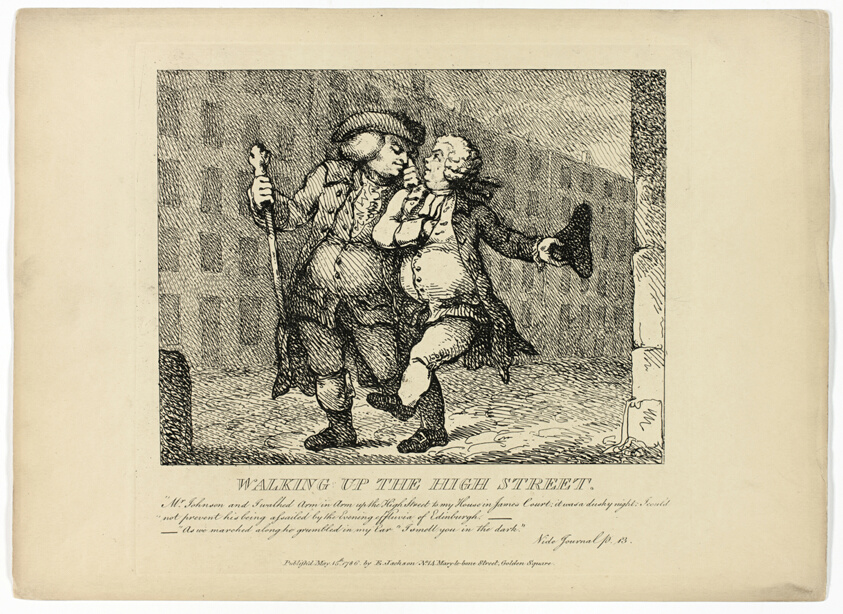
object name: Print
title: Walking up the High Street, from Boswell's Tour of the Hebrides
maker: Thomas Rowlandson (English, 1756-1827)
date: 1786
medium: Etching on paper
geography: England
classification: etching; print; prints and drawing